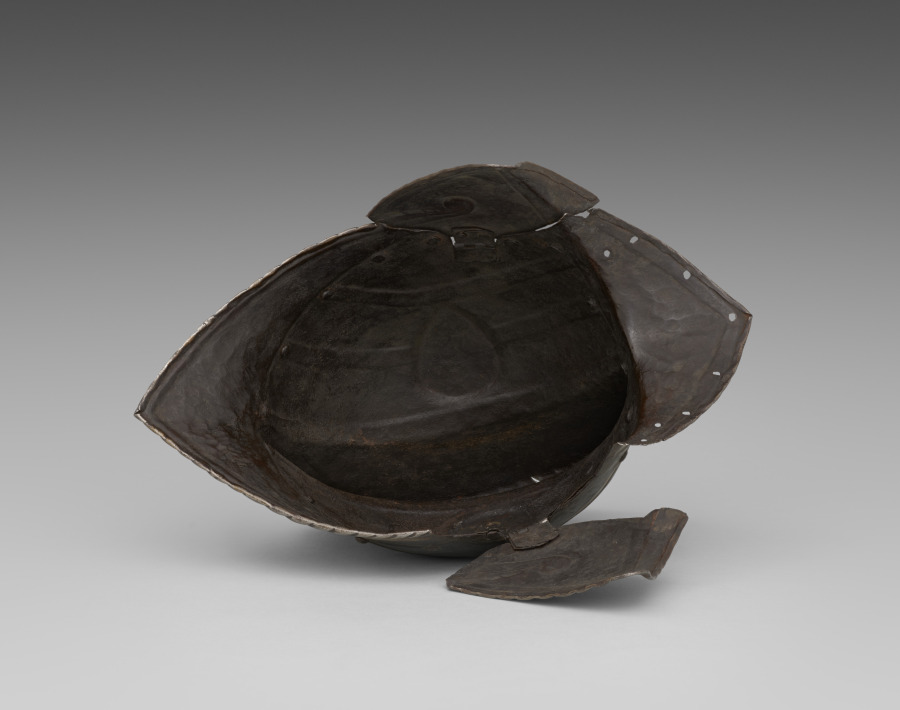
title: Black and White Burgonet (of the Civic Guard of Bologna)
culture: Italy, late 16th Century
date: c. 1580–1600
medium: steel with black paint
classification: Arms and Armor